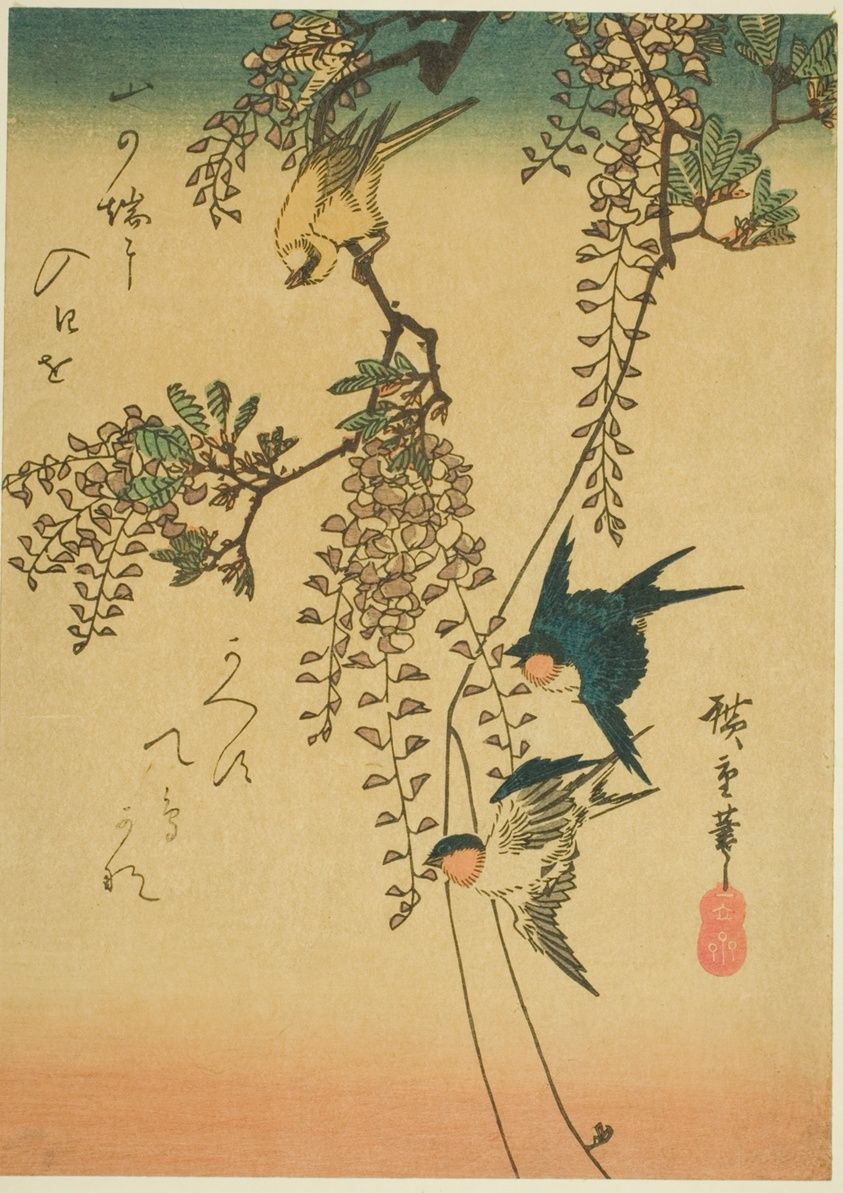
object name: Print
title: Swallow, yellow bird, and wisteria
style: Japanese (culture or style)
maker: Utagawa Hiroshige 歌川 広重; Japanese, 1797-1858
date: 1830s–1840s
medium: Color woodblock print; chuban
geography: Japan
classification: woodblock print; print; asian art